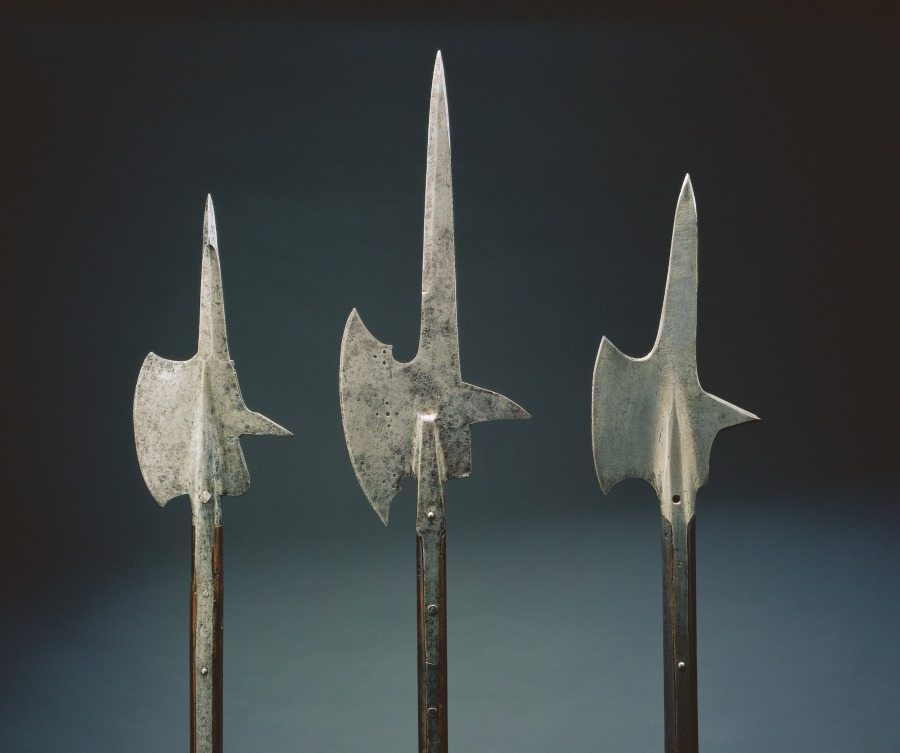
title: Halberd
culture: Germany (?)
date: 1475–1500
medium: steel, pierced circular holes; wood haft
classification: Arms and Armor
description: The halberd was a staff weapon favored by European infantries (foot soldiers) of the 1400s and 1500s for its versatility and deadly effect. The word halberd comes from the German words Halm (staff) and Barte (axe). The halberd is, in fact, an axe that served multiple functions: the axe blade was used for hacking, the spike for thrusting, and the beak for piercing plate armor or for pulling a knight from his saddle. The halberd was used by shock troops (those who lead an attack) and by Swiss and German mercenaries. After about 1550, the halberd gradually became less functional. Its large blade provided space for coats of arms and insignia. By the late 1500s, the parade halberd had become a ceremonial weapon for palace guards.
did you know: The first halberds are believed to have been made for warriors of medieval Switzerland.